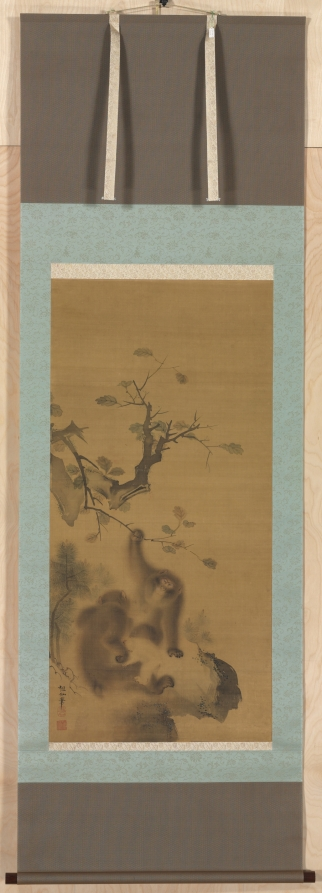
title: Monkeys on a Rock Ledge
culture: Japan, Edo period (1615–1868)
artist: Mori Sosen (Japanese, 1747–1821)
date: c. 1800–1821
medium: hanging scroll, mounted and framed, ink and color on silk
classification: Painting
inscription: signature on left